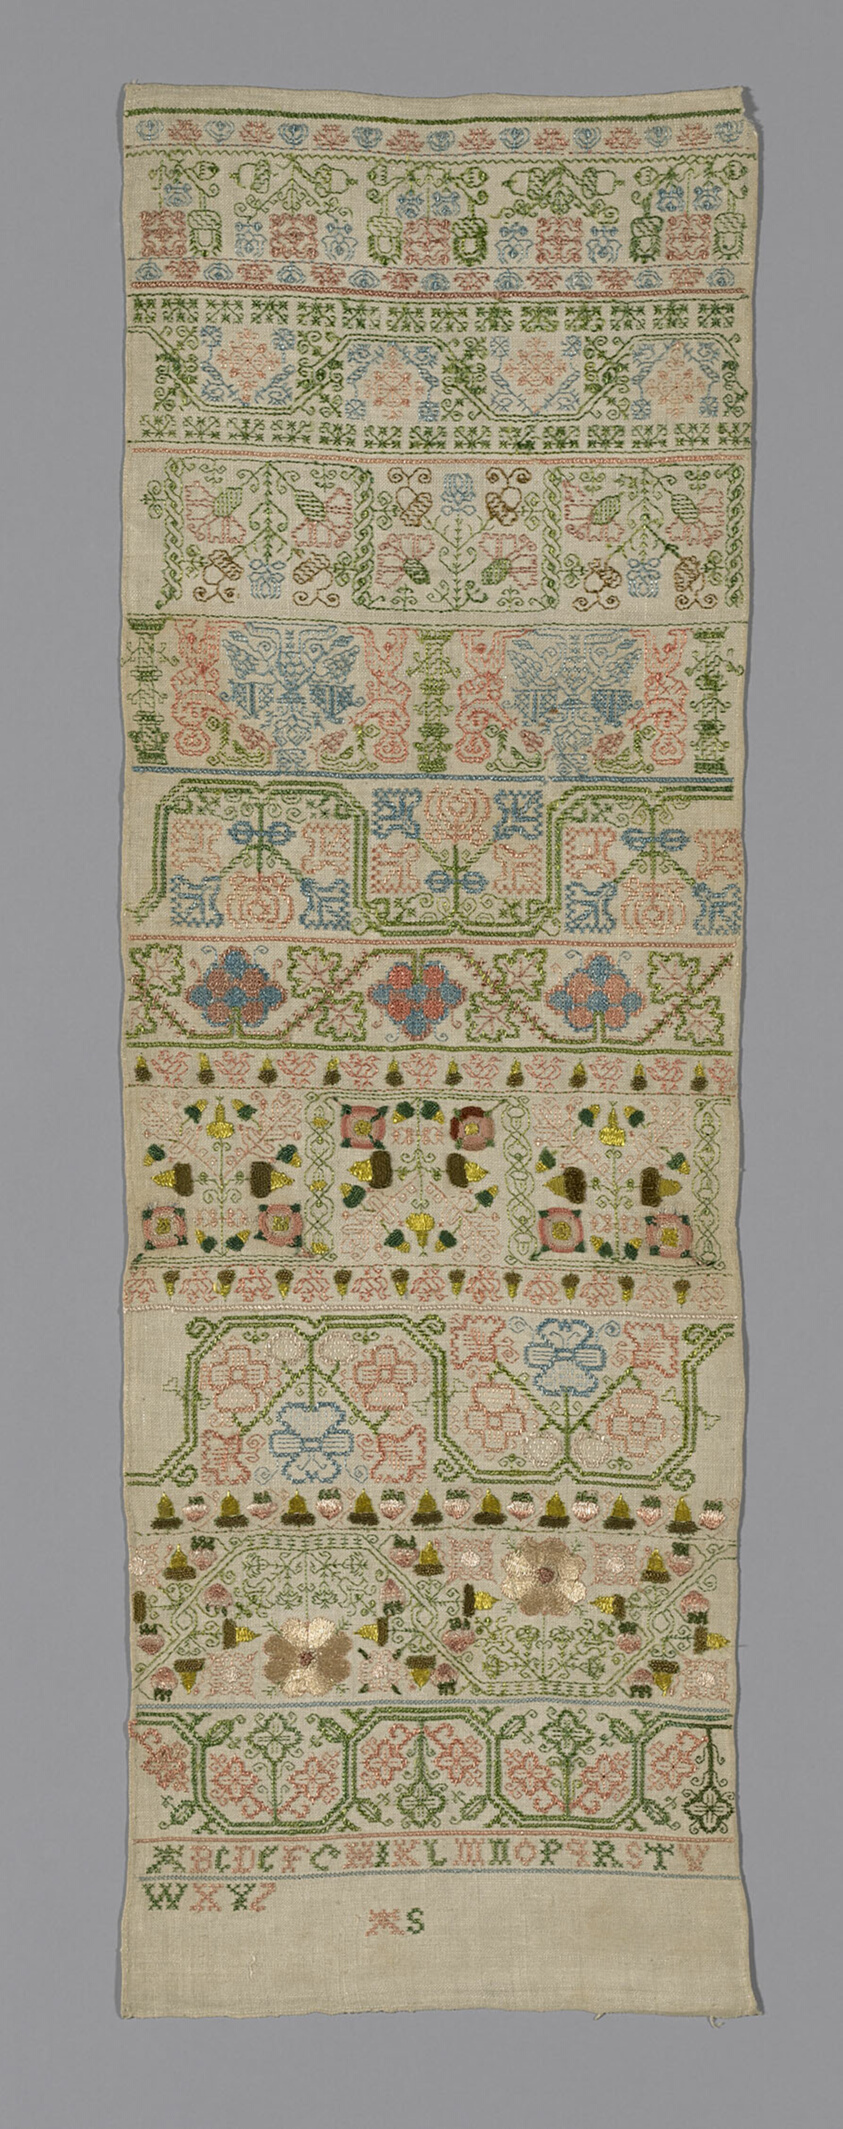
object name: Textile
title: Sampler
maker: England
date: c. 1660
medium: Linen, plain weave; embroidered with silk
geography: England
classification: textile; needlework (visual works)